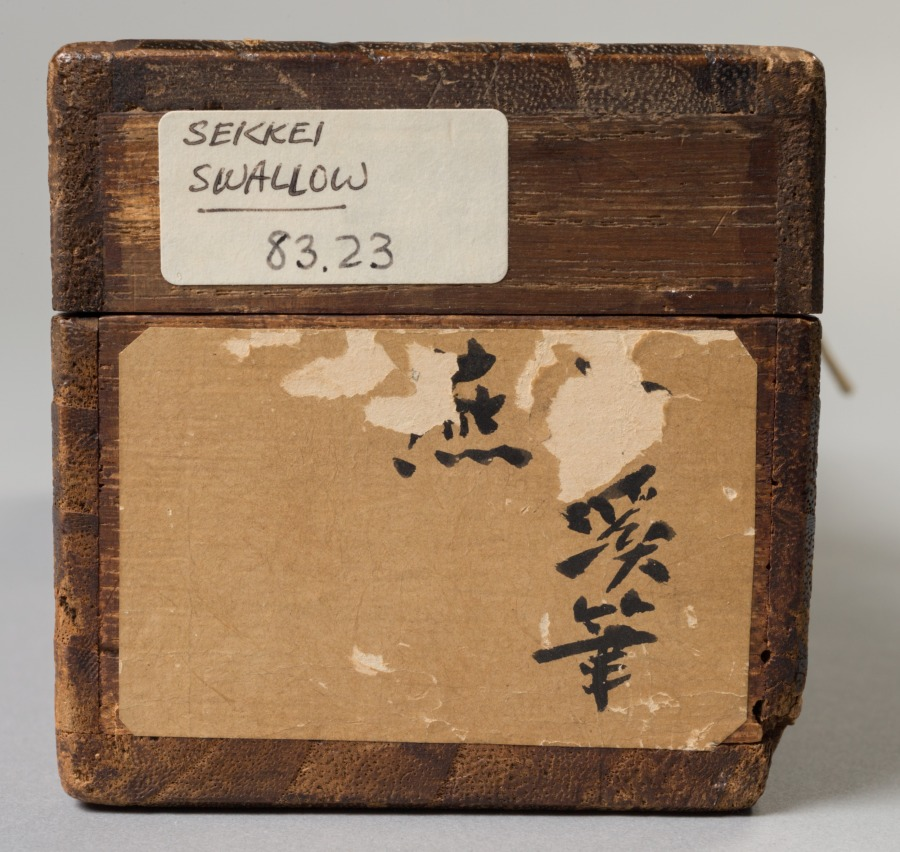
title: Swallows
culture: Japan, Edo period (1615–1868)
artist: Yamaguchi Sekkei (Japanese, 1644–1732)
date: late 1600s–early 1700s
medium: hanging scroll; ink and color on paper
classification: Painting